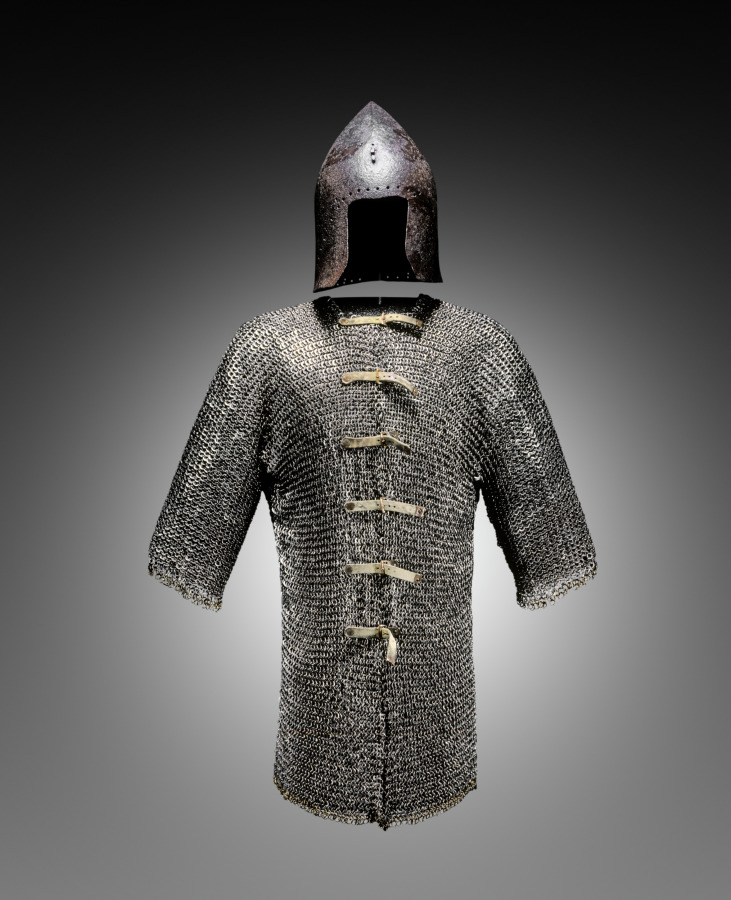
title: Hauberk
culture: Germany (?)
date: c. 1400–1450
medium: steel and brass rings, riveted with modern buckles and straps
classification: Arms and Armor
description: Mail armor was the predominant form of metal body defense for European knights until about 1350. The term derives from the Old French word maille (mesh), implying a protective textile. Each mail garment was constructed of small linked metal rings and "woven" for a specific part of the body. Mail for the torso is a hauberk and typically reached mid-thigh.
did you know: Mail was expensive to make and generally only available to warriors of noble birth unless it could be obtained as war booty.